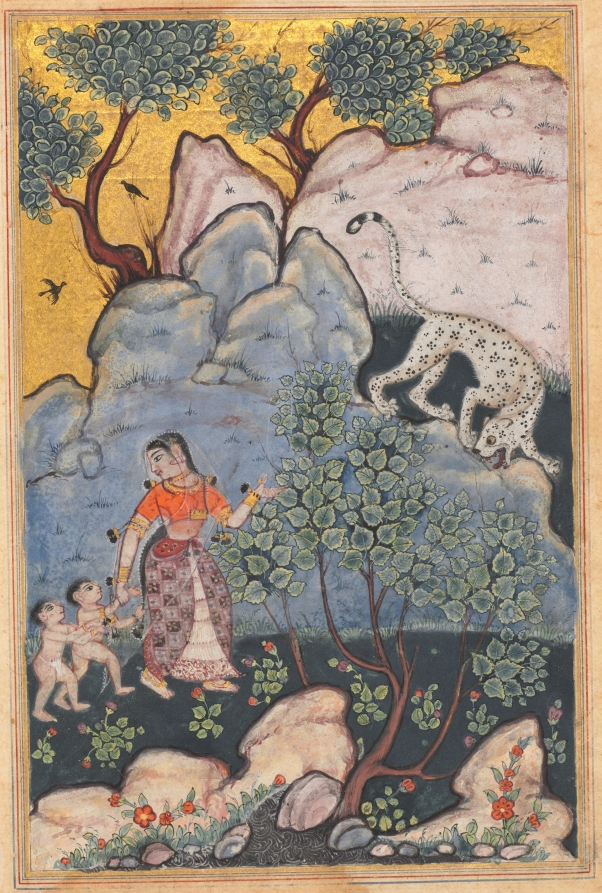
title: A woman with two children, having abandoned her home, goes into the forest where she encounters a leopard, from a Tuti-nama (Tales of a Parrot): Thirtieth Night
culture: Mughal India, court of Akbar (reigned 1556–1605)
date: c. 1560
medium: gum tempera, ink, and gold on paper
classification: Painting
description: A woman described as ill-tempered and quarrelsome was beaten by her husband, so she fled with her children into the wilderness. A fearsome leopard approached them, hoping to carry the children away for a meal. Thinking quickly, the woman offered the leopard one of her children and half of her own body, stating that a lion has staked claim to the other half. Fearing rivalry with the lion, the leopard quickly fled. The gold sky and arid landscape in shades of pink and blue derive from painting styles of northwestern Iran, but the woman’s dress is the tied blouse and wrapped skirt of India.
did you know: The woman is described as bad-tempered, quarrelsome, sharp-tongued, gossipy, and peevish.